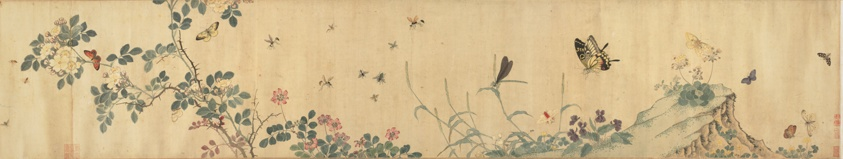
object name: Painting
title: Flowers and Insects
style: Chinese (culture or style)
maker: Chai Zhenyi 柴貞儀 and Chai Jingyi 柴靜儀; Chinese, 17th century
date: Qing dynasty (1644–1911), reign of Kangxi (1662–1722)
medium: Handscroll; ink and color on paper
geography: China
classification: handscroll; painting; asian art